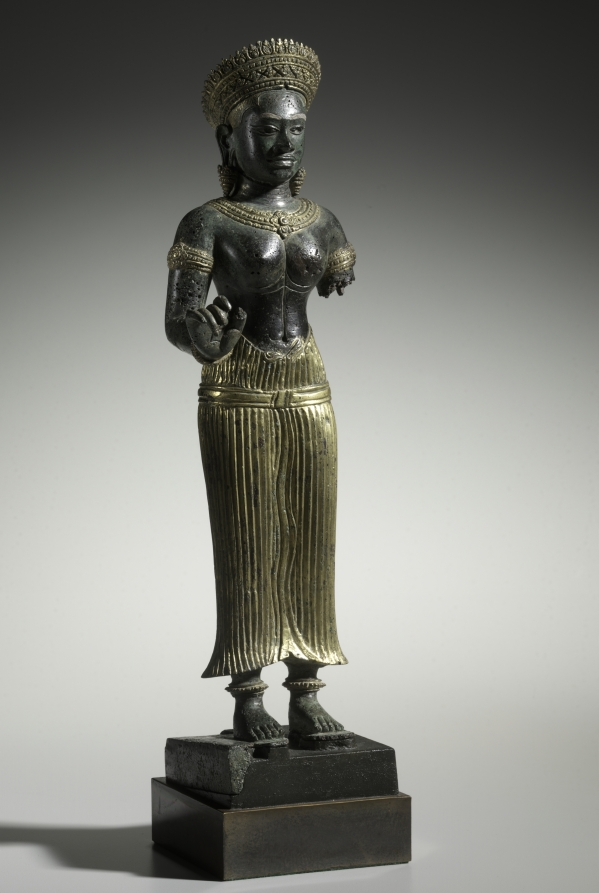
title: Royal Female Figure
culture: Cambodia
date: late 1000s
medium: partially gilt bronze and silver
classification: Sculpture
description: The identity of this figure is uncertain, since the objects she held are missing, and no other related sculptures have been located. Since she has only two arms and wears a crown, she is probably a royal woman. Semiprecious stones or metals, such as onyx or silver, would have been inlaid into her eyes and eyebrows, further enlivening her image. The gilded adornments are set off against her dark shining skin to dazzling effect. Most Cambodian stone sculptures have lost their gold jewelry, so this figure gives an accurate impression of how many would have looked when installed in their sanctuaries.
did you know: This royal female figure's eyebrows and pupils were originally inlaid with silver or semiprecious stones.